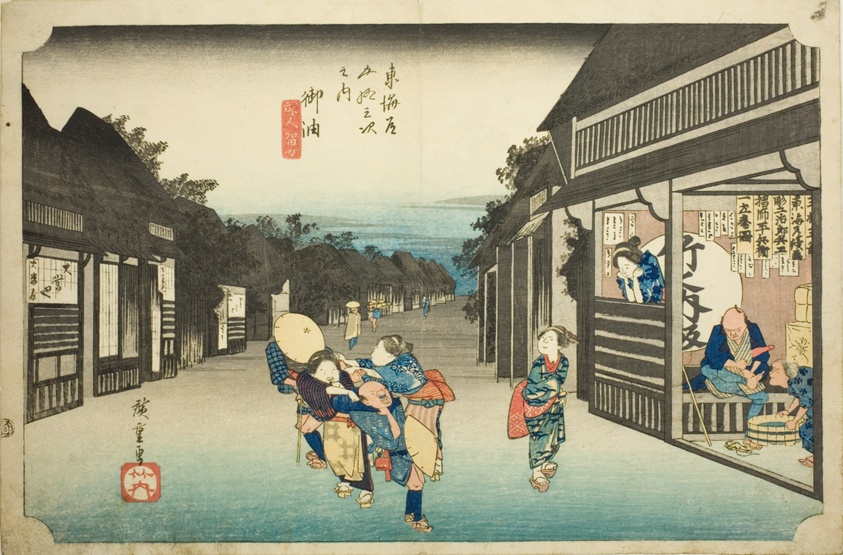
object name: Print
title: Goyu: Women Stopping Travelers (Goyu tabibito tomeru onna), from the series “Fifty-three stations of the Tokaido (Tokaido gojusan tsugi no uchi)," also known as the Hoeido Tokaido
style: Japanese (culture or style)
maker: Utagawa Hiroshige 歌川 広重; Japanese, 1797-1858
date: c. 1833/34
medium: Color woodblock print; oban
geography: Japan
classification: woodblock print; print; asian art